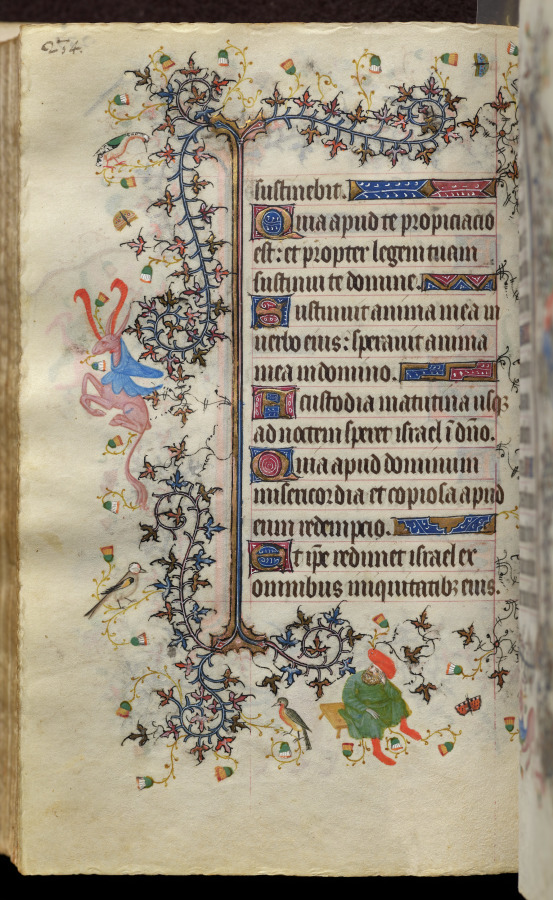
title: Hours of Charles the Noble, King of Navarre (1361-1425): fol. 117v, Text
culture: France, Paris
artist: Master of the Brussels Initials and Associates (French)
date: c. 1405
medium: ink, tempera, and gold on vellum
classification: Bound Volume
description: This precious volume was obviously highly prized by its owner, the French-born King of Navarre, who had his coat of arms painted on no less than twenty folios. Rather than directly commissioning this manuscript from a specific workshop, it seems that Charles the Noble acquired his book of hours -- perhaps ready-made for the luxury market -- while on a trip to Paris in 1404-05. A collaborative effort, six painting styles are evidenced within the pages of this codex, those of two Italians, two Frenchmen, and two Netherlanders. The painter who was responsible for the planning and decoration of the book, and who produced seventeen of the large miniatures, was a Bolognese artist known as the Master of the Brussels Initials. His principal assistant, responsible for most of the borders, was a Florentine who signed his name "Zecho" da Firenze on folio 208 verso.